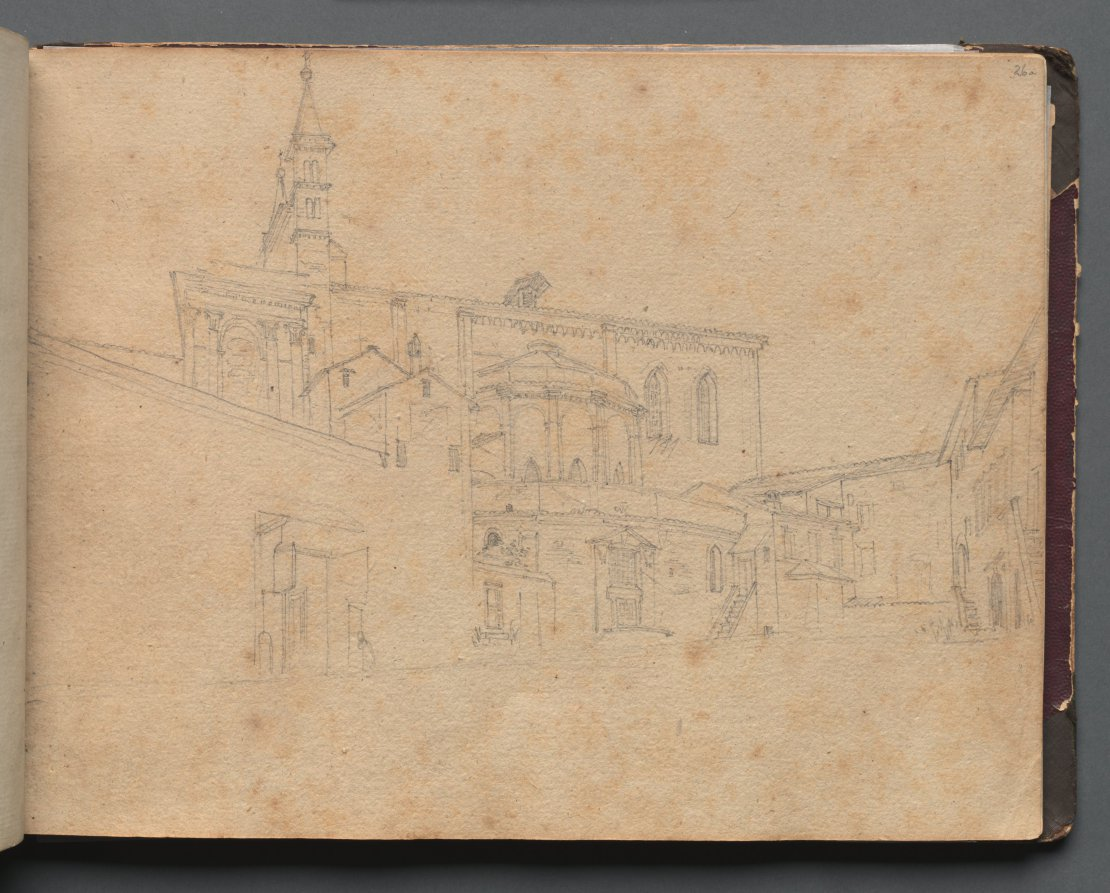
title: Album with Views of Rome and Surroundings, Landscape Studies, page 26a: Roman Architectural View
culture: Germany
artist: Franz Johann Heinrich Nadorp (German, 1794–1876)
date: c. 1830s-70s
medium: graphite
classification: Bound Volume